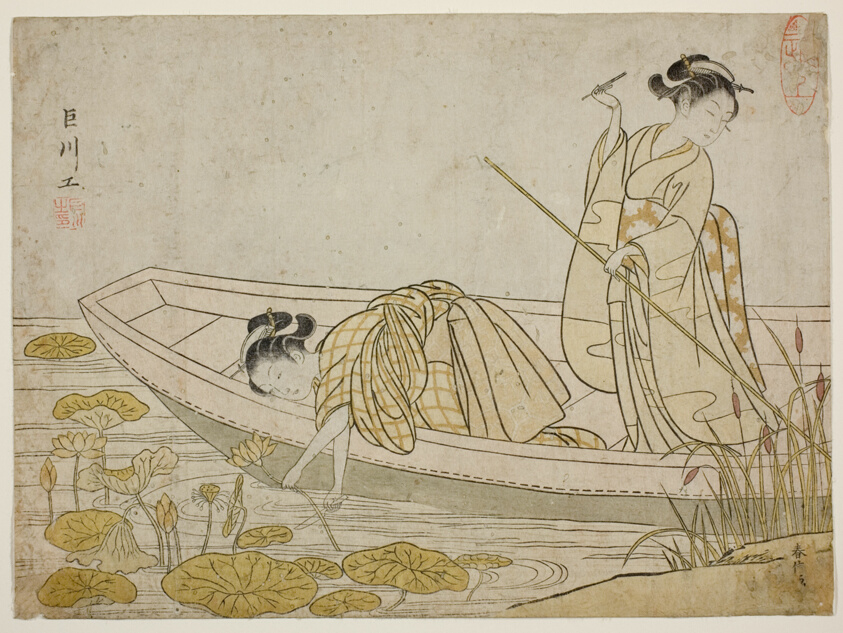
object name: Print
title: Gathering Lotus Flowers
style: Japanese (culture or style)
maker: Suzuki Harunobu 鈴木 春信; Japanese, 1725 (?)-1770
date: 1765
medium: Color woodblock print; chuban, surimono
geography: Japan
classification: woodblock print; print; asian art